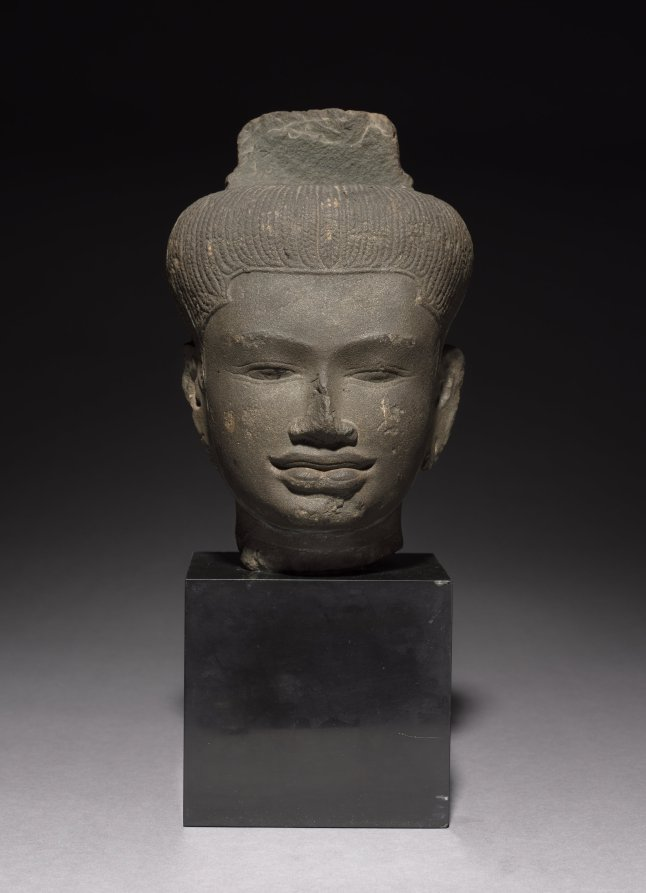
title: Head of a Follower of Shiva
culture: Cambodia, Angkor, 10th century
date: 900s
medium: sandstone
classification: Sculpture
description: Khmer patrons and artists produced works of art that could depict either a deified king or a god who has royal attributes. The Khmer cult of the god-king allowed for such fluidity of interpretation. Presence of a third eye in the forehead and matted locks of hair are attributes both of the Hindu god Shiva and the followers who emulated him in order to get closer to him.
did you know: The third eye on the forehead is a symbol of enlightenment.